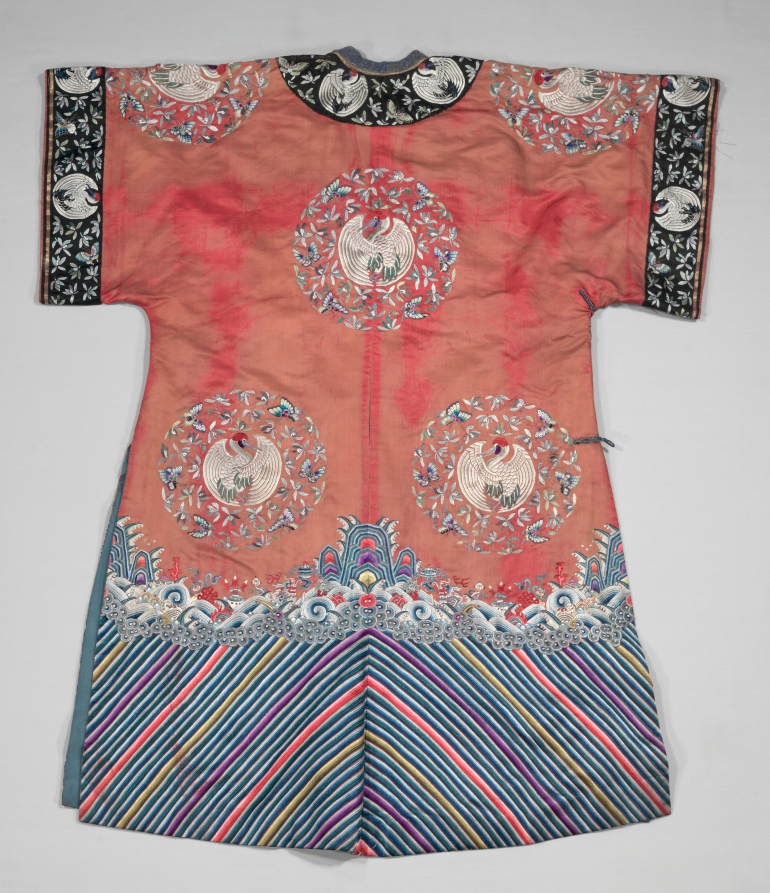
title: Title Robe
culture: China, late 19th century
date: c. 1890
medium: embroidery, silk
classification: Garment